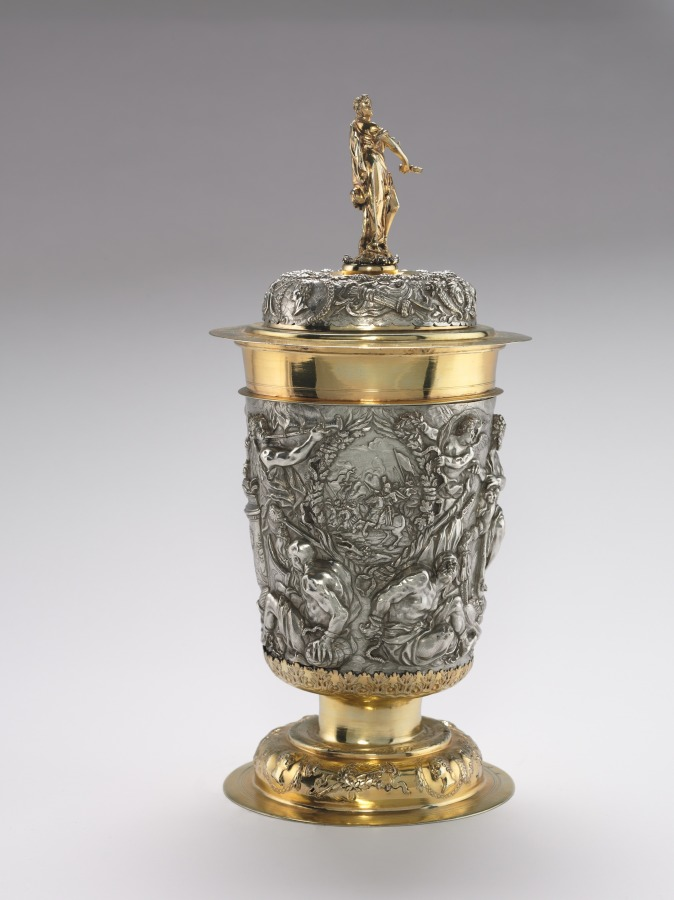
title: Covered Cup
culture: Germany, Augsburg, 17th century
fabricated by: Johann Andreas Thelot (German, 1655–1734)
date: 1688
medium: silver and gilt silver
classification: Metalwork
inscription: incised: J. A. Thélot. 1688.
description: Thelot was one of the most important silversmiths active in Germany in the late 1600s and early 1700s. The decorations of this cup refer to the defeat of the Turks in Central Europe in the 1680s.